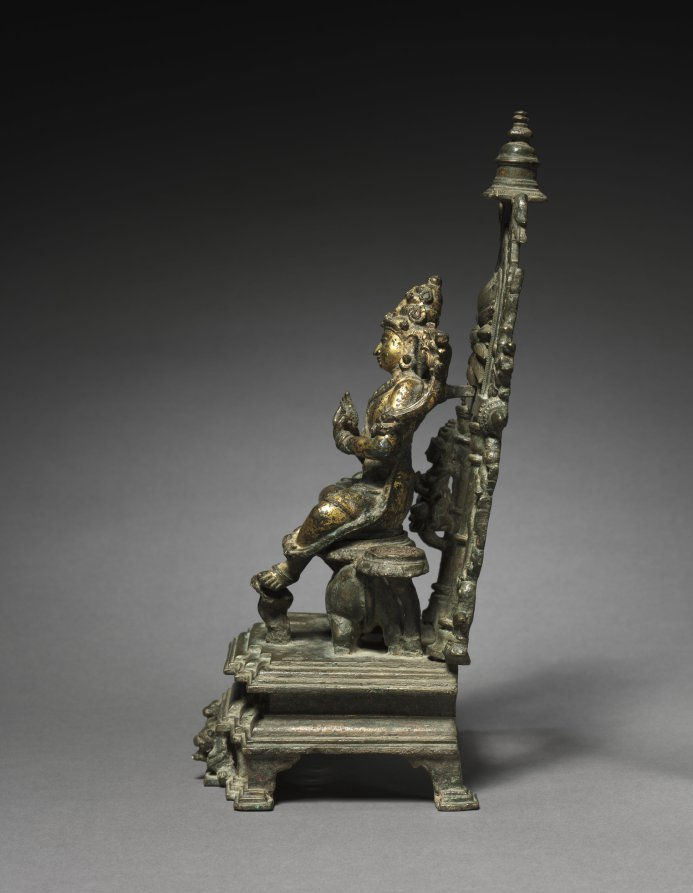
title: Bodhisattva Manjushri: Lord of Wisdom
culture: East India, Bengal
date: 1000s–1100s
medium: Bronze with gilding and inlay of semiprecious stones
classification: Sculpture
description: The Bodhisattva of Wisdom can be identified by the lion mount, the horizontal palm-leaf manuscript on the lotus above his left shoulder, and the stupa above his head. His seat and footrests are lotus flowers, indicating transcendence of the ordinary world.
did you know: His hand gestures show that he teaches the wisdom that leads to enlightenment.